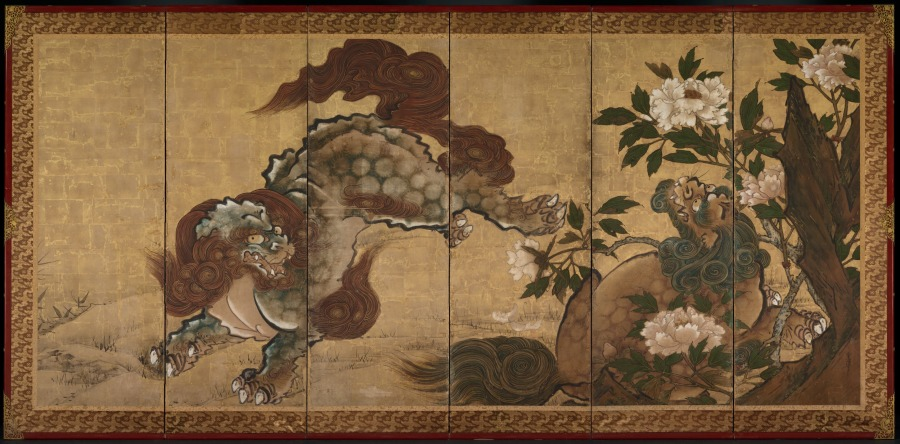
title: Lions and Tigers in Peony and Bamboo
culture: Japan, Edo period (1615–1868)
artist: Yamaguchi Sekkei (Japanese, 1644–1732)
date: 1668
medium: pair of six-panel folding screens; ink and color on gilded paper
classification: Painting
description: Sekkei lived and studied painting in Kyoto at the Kano school studio, the center of traditional painting activity in Japan since 1500. The use of gold foil as a backdrop for the frolicking animals served a practical as well as a decorative function. Because traditional Japanese rooms had no windows, interior lighting came from portable oil lamps and wax candles, whose effects were magnified by reflective surfaces.